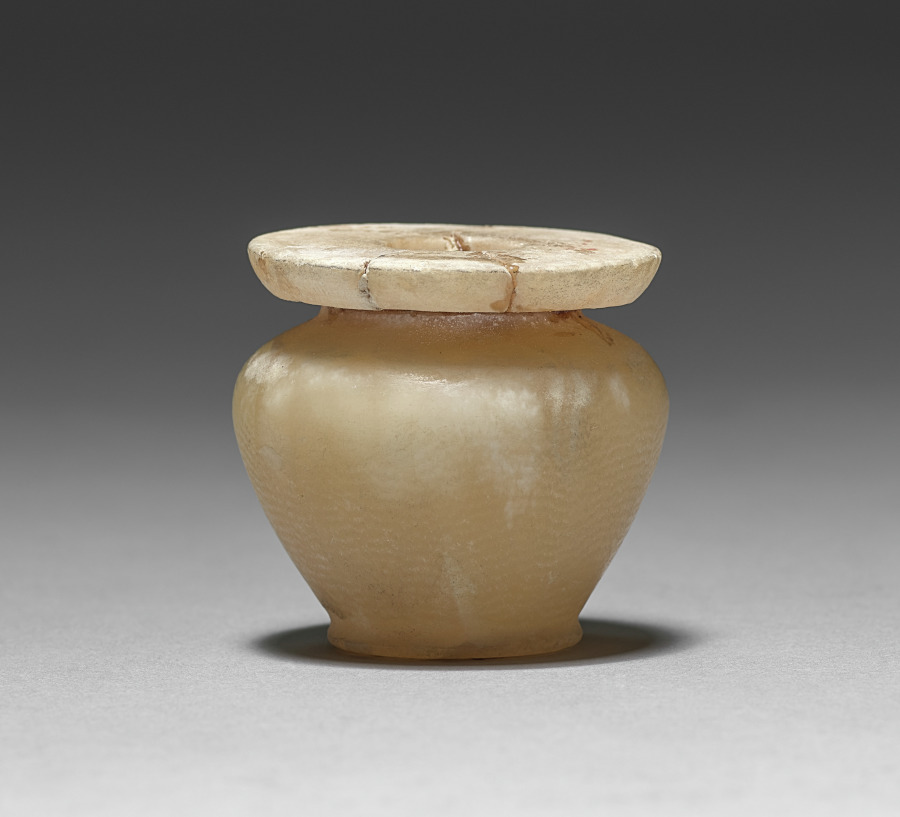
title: Kohl Jar with Lid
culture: Egypt, Middle Kingdom (2040–1648 BCE), Dynasty 12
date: 1980–1801 BCE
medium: travertine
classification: Vessels